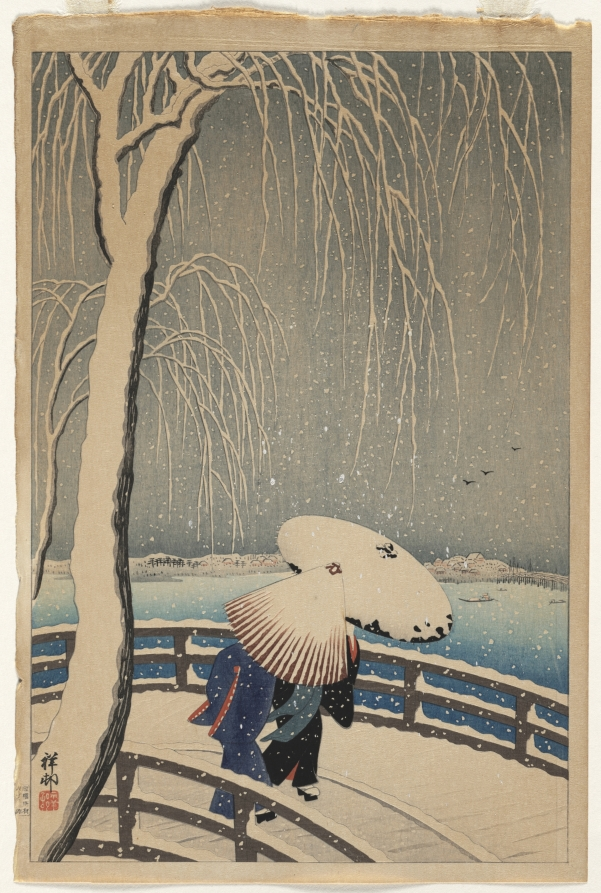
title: Umbrellas in Snow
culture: Japan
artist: Ohara Shoson (Japanese, 1877–1945)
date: 1931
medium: color woodblock print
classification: Print